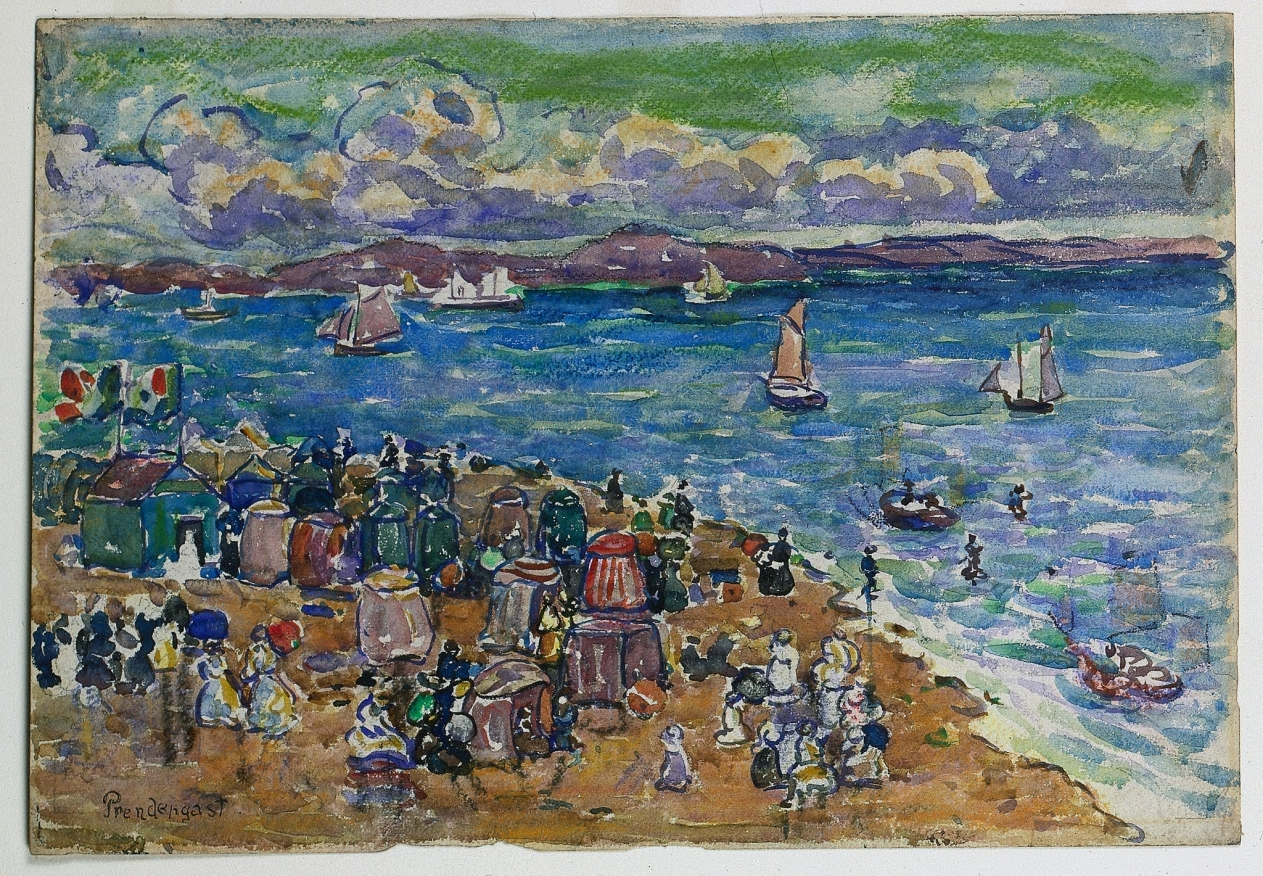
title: Beach Scene, St. Malo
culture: America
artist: Maurice Prendergast (American, born Newfoundland [now Canada], 1858–1924)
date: c. 1909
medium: watercolor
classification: Drawing